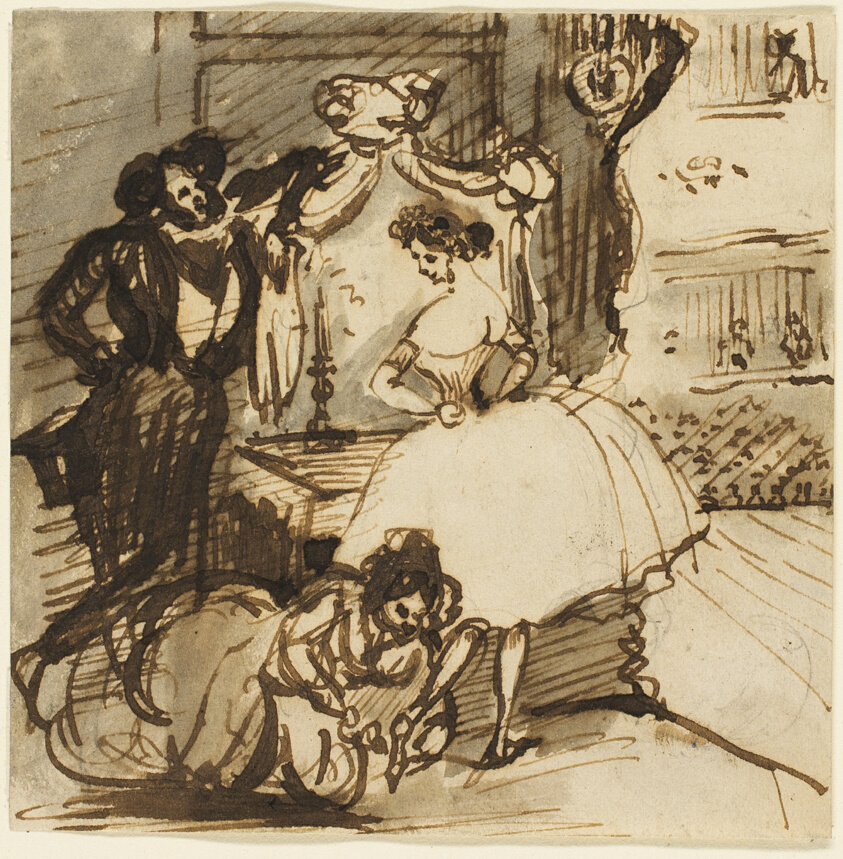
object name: Drawing and Watercolor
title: After the Ballet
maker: Constantin Guys (French, 1802-1892)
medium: Pen and brown ink, with brush and gray wash, over graphite, on ivory wove paper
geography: France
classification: pen and ink drawings; drawings (visual works); prints and drawing